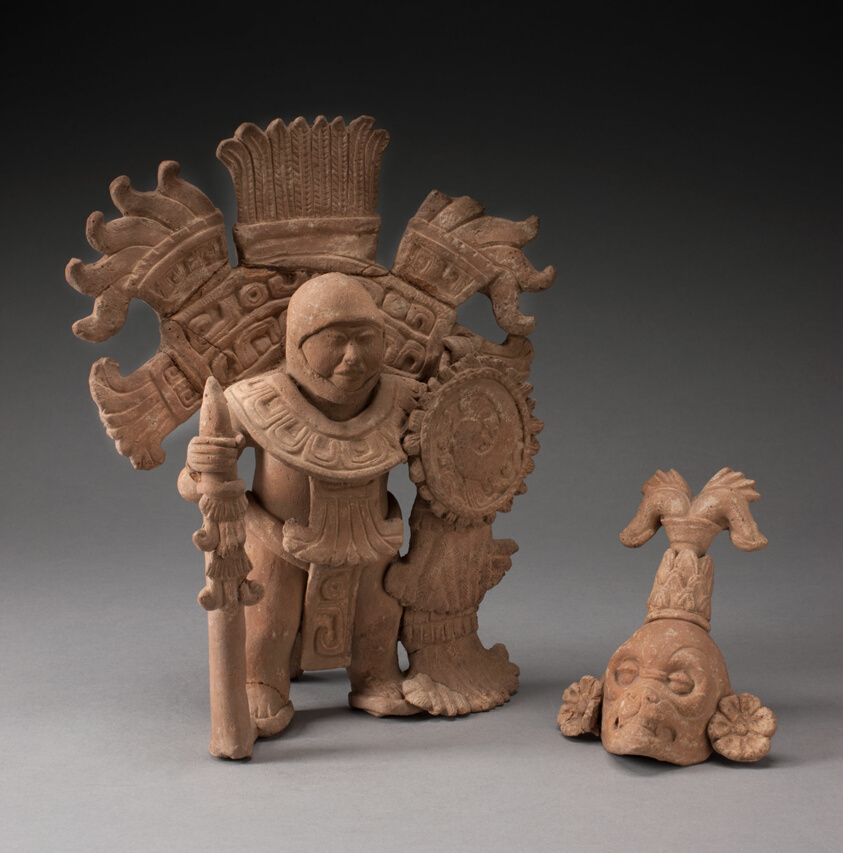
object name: Sculpture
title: Standing Warrior Figure with Removable Mask and Headdress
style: classic veracruz, Arts of the Americas, veracruz, mesoamerican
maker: Classic Veracruz; Veracruz, Mexico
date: 700–1000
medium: Ceramic and pigment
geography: Veracruz state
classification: sculpture; ceramics; masks; art of the americas; statue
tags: warriors, warefare, people